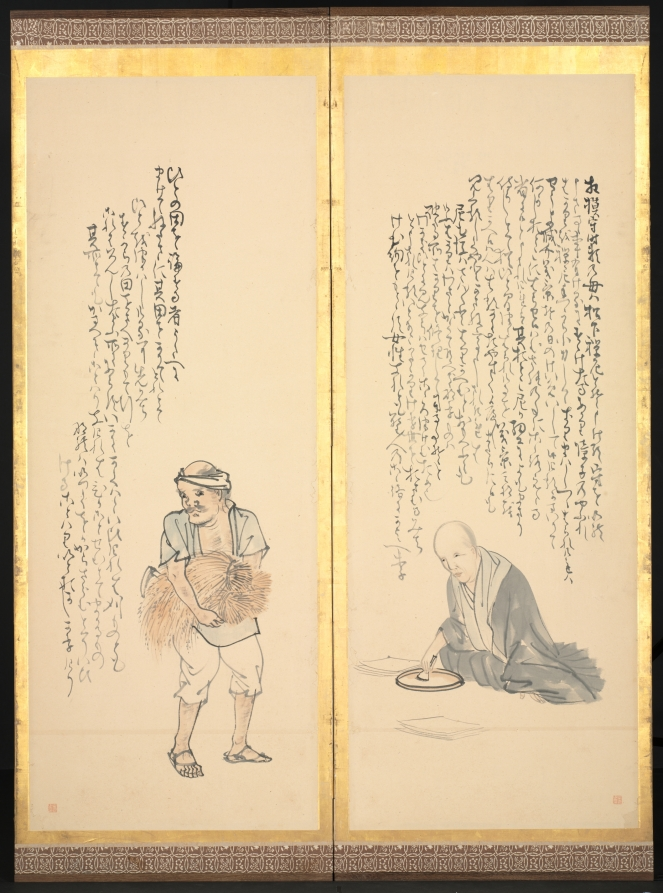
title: Scenes from Essays in Idleness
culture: Japan, Edo period (1615–1868)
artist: Matsumura Goshun (Japanese, 1752–1811)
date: late 1700s–early 1800s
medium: One of a pair of six-panel folding screens; ink and color on paper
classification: Painting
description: Matsumura Goshun inscribed passages from Buddhist monk Yoshida Kenkō’s (1283–1350) well-known collection of anecdotes, Essays in Idleness, across the top of the panels of this screen and its pair. Goshun illustrated the narratives with his vision of the figures who feature in them. The texts cascade down from right to left, forming unique compositional relationships with the images below. The episodes offer a veritable portrait of human idiosyncrasy, from one man’s deep faith in radishes to another’s inability to avoid nicknames.